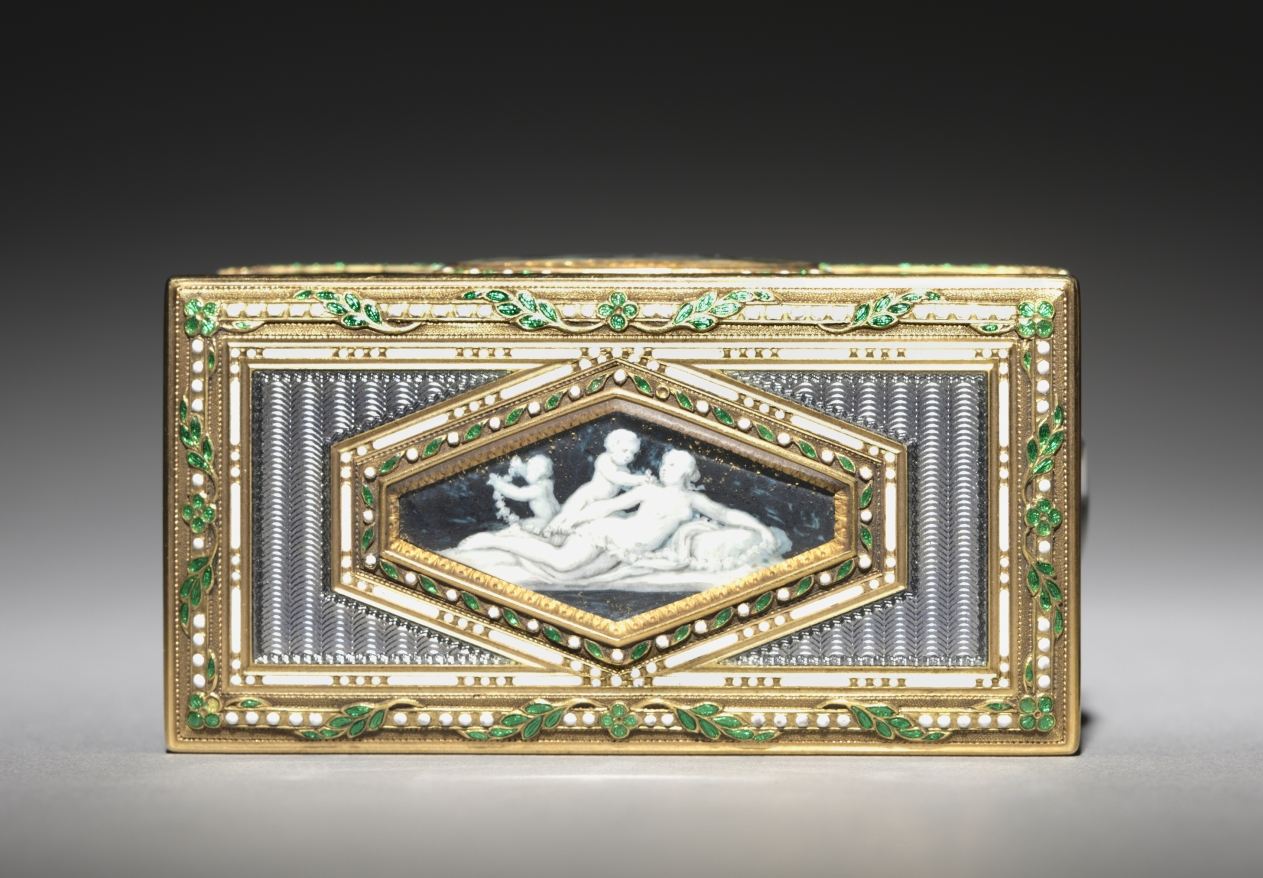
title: Snuff Box (Tabatière)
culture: France, 18th century (style of Louis XVI)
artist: François Chazeray (French)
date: 1777–78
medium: gold and enamel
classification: Metalwork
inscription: [Maker's mark of François Chazeray, master goldsmith in 1760, cover; bottom; front wall]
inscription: [Warden's mark (probably a crowned "O"), Paris, 1777-1778, cover; bottom; front wall]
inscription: [Illegible mark, bottom]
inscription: [Illegible mark, cover]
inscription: [Illegible charge mark, inside front]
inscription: [Discharge mark of Jean-Baptiste Fouache, Paris, 1774-1780, on neck at left.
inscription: [Outside of neck, modern inscription '4 (modern inscription]:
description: This box is decorated with figures of antiquity associated with love: winged cupids, dancing nymphs, and representations of the Greek goddess of love. These scenes are inspired by antique cameos, intricately carved gemstones crafted in ancient Greece and Rome. This interest in ancient iconography, symmetry, and classical compositions of gods and goddesses was characteristic of 18th-century neoclassicism.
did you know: Decorated with allegorical scenes of love, it is likely that this box was a present between lovers.